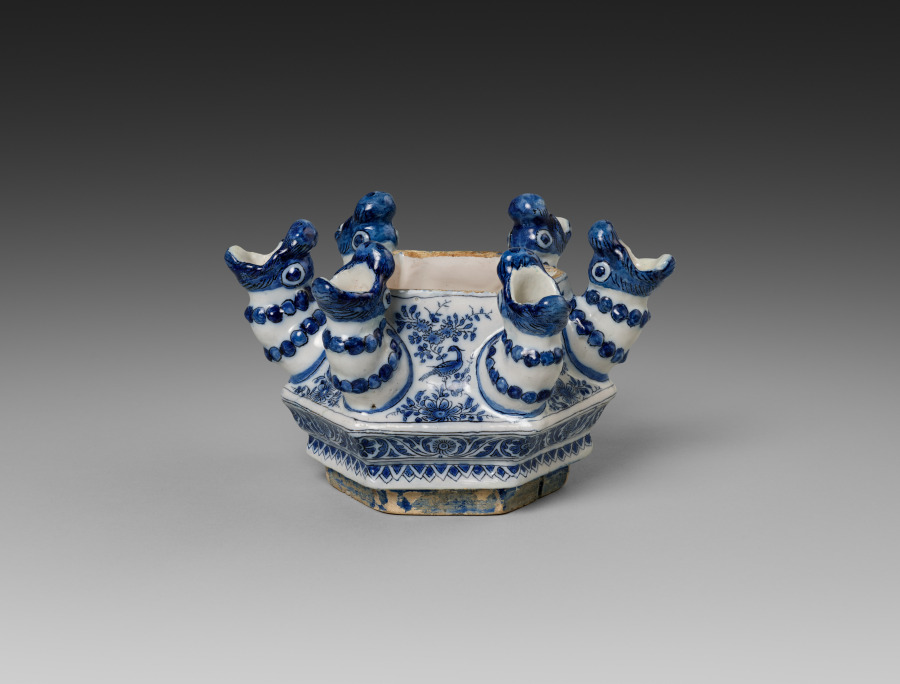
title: Fourth Tier for a Flower Pyramid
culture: Netherlands, Holland, Delft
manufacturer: Adrianus Kocx (Dutch, active 1686–1701)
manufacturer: De Grieksche A (The Greek A) Factory (Netherlands, 1658–1811)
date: c. 1690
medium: Tin-glazed earthenware, painted in blue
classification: Ceramic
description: Allegorical figures representing Faith, Hope, and Love decorate the base of this pyramid, on which rest six tiers with spouts where flowers can be placed. Flower pyramids are among the most complex and luxurious types of ceramics produced in Delft in the late 1600s. This example was made in the Greek A Factory, owned by Adrianus Kocx. During his tenure, the factory became the most prestigious of Delft potteries and received commissions from Queen Mary II, who ruled over England, Scotland, and Ireland together with her husband, William III. She contributed to the international spread of the fashion for Delft ceramics.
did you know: The iconic blue-and-white ceramics from Delft originated as an attempt to copy Chinese porcelain.